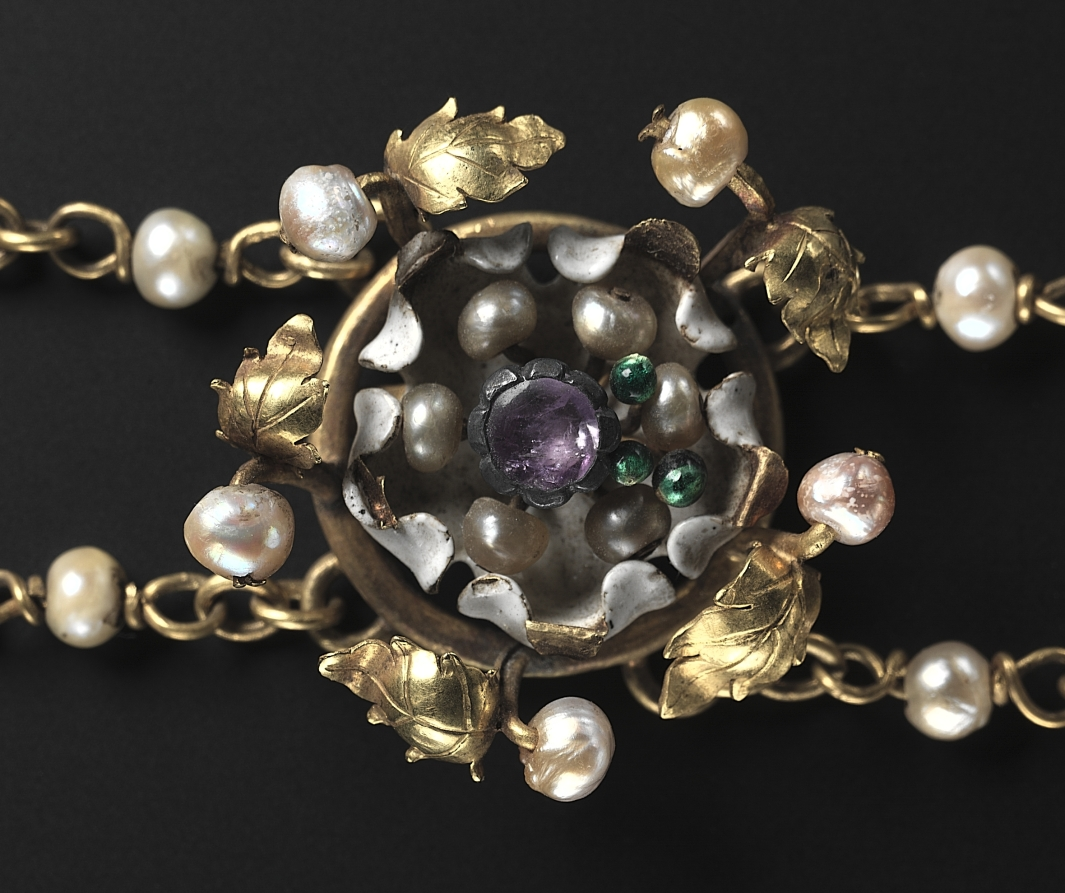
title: Twelve Medallions Mounted as a Necklace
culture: France, Paris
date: c. 1400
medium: enameled gold, precious stones, and pearls; some later additions with modern chain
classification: Jewelry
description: These medallions, which have loops on the backs, must have originally been sewn onto a garment or, more likely, a woman’s headpiece. In spite of the modern chain to which they are now attached, the medallions are unique items of feminine apparel from around 1400. Such items would have been well known at the courts of the Valois in Paris, Bourges, and Dijon. The central medallion with a “white lady” is enameled “in the round”––a new Parisian technique for enameling irregular or three-dimensional surfaces. Such white lady medallions are described in inventories of the period